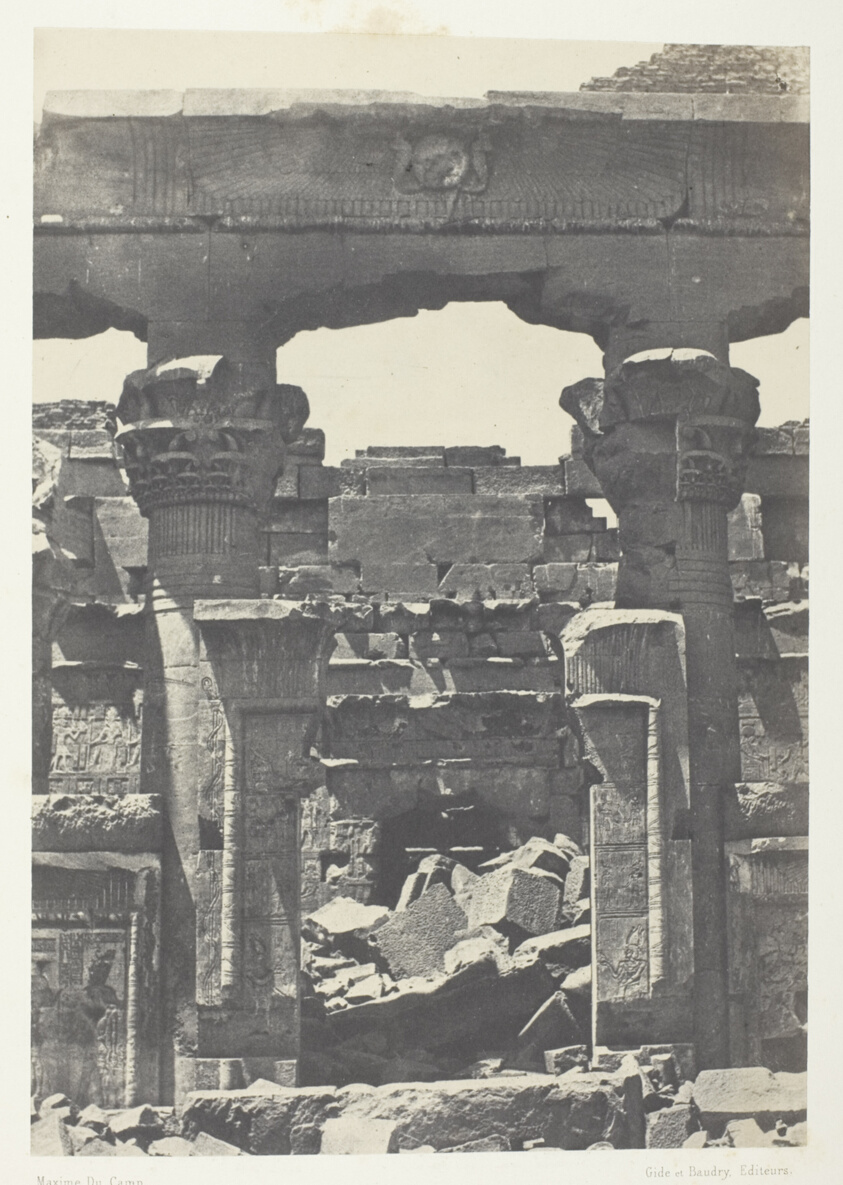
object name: Photograph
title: Kalabscheh, Porte du Pronaos; Nubie, plate 90 from the album "Egypte, Nubie, Palestine et Syrie" (1852)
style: 19th century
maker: Maxime Du Camp (French, 1822–1894)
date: 1849/51, printed 1852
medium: Salted paper print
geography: France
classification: salted paper print; photographic process; photography; photograph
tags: Collected by Hugh Edwards, Egypte, Nubie, Palestine et Syrie